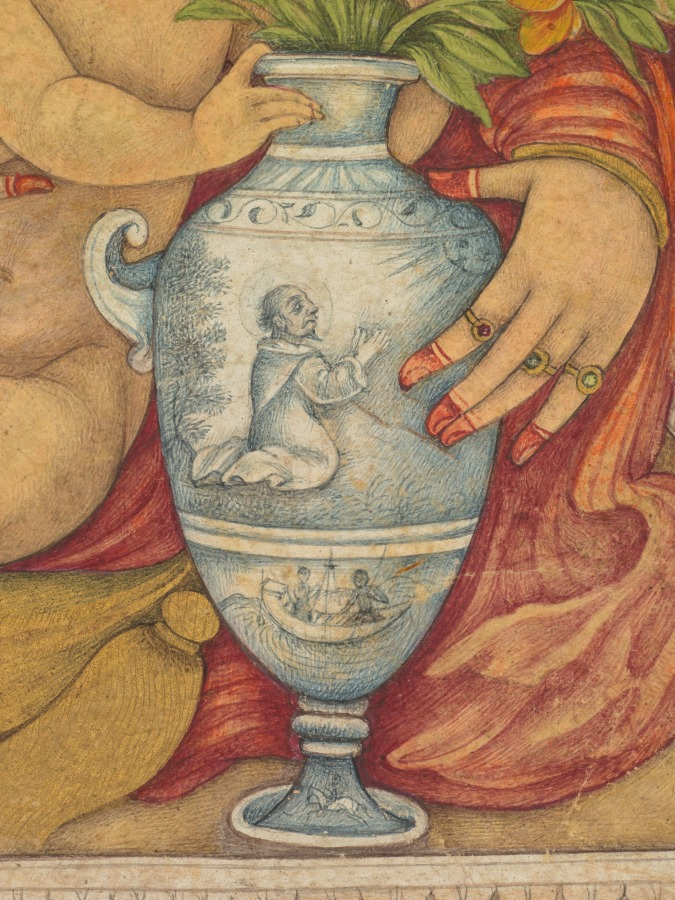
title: The Holy Family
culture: Northern India, Mughal court, early 17th century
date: c. 1620s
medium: Gum tempera and gold on paper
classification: Painting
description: This painting of Joseph, the Virgin Mary, and the infant Jesus is based on European sources, but it also contains several details that are specifically Indian. For example, although Mary is dressed in classical European-style robes, she is adorned with jewelry of rubies and emeralds, the preferred gems of Mughal royalty. Her fingertips are also red with henna, and she wears a bindi on her forehead. The detailed rendering of the vase evokes the Catholic St. Francis as well as Indian worship of the sun. The vessel itself points to the appreciation of Chinese blue-and-white ware imported from imperial Ming-dynasty kilns to the court of Jahangir (reigned 1605–27).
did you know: With hennaed fingertips Mary holds the vase so baby Jesus doesn’t tip it over.